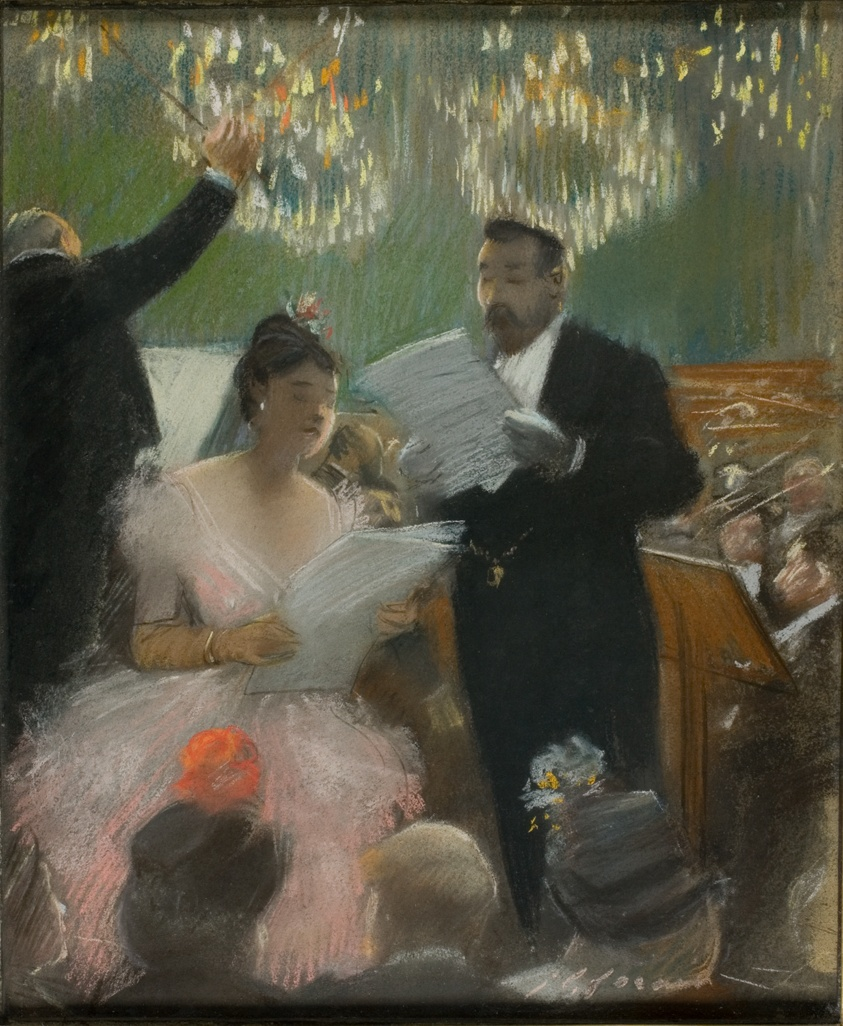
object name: Drawing and Watercolor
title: The Orchestra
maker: Jean Louis Forain (French, 1852-1931)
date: c. 1880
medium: Soft pastel on paper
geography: France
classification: pastel; drawings (visual works); prints and drawing